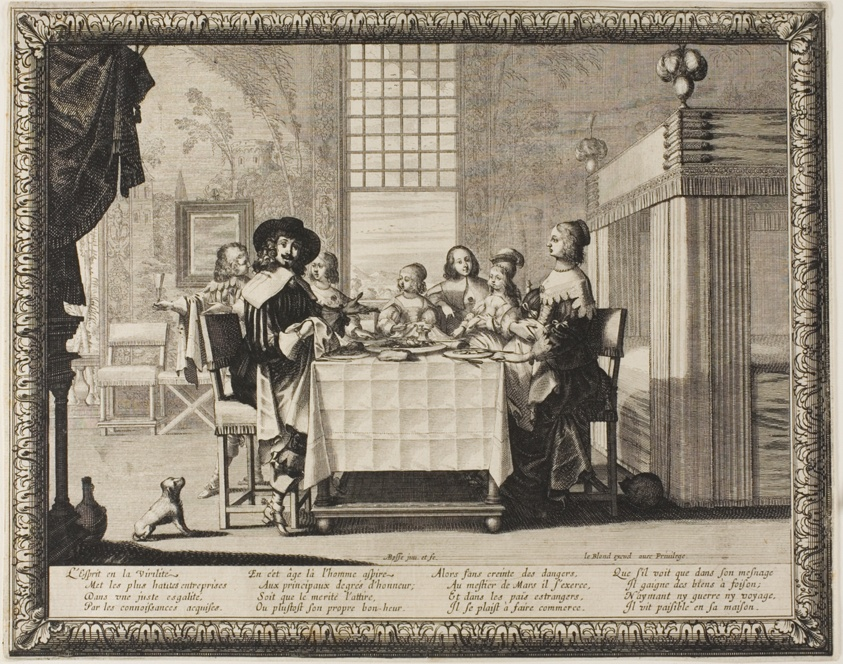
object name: Print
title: Manhood, plate three from The Four Ages of Man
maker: Abraham Bosse (French, 1602-1676)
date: 1636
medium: Etching on paper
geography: France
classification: etching; print; prints and drawing